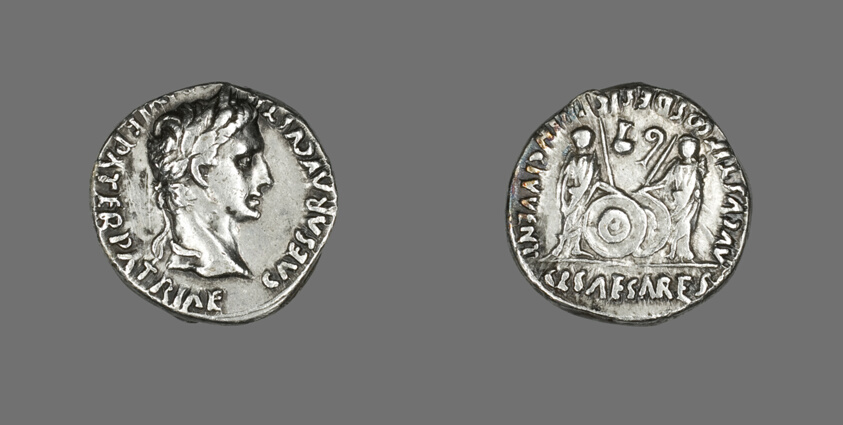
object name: Coin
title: Denarius (Coin) Portraying Emperor Augustus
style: roman (ancient, style or period), ancient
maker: Roman, minted in Lyons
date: 2 BCE-4 CE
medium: Silver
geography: Roman Empire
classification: coin; ancient art